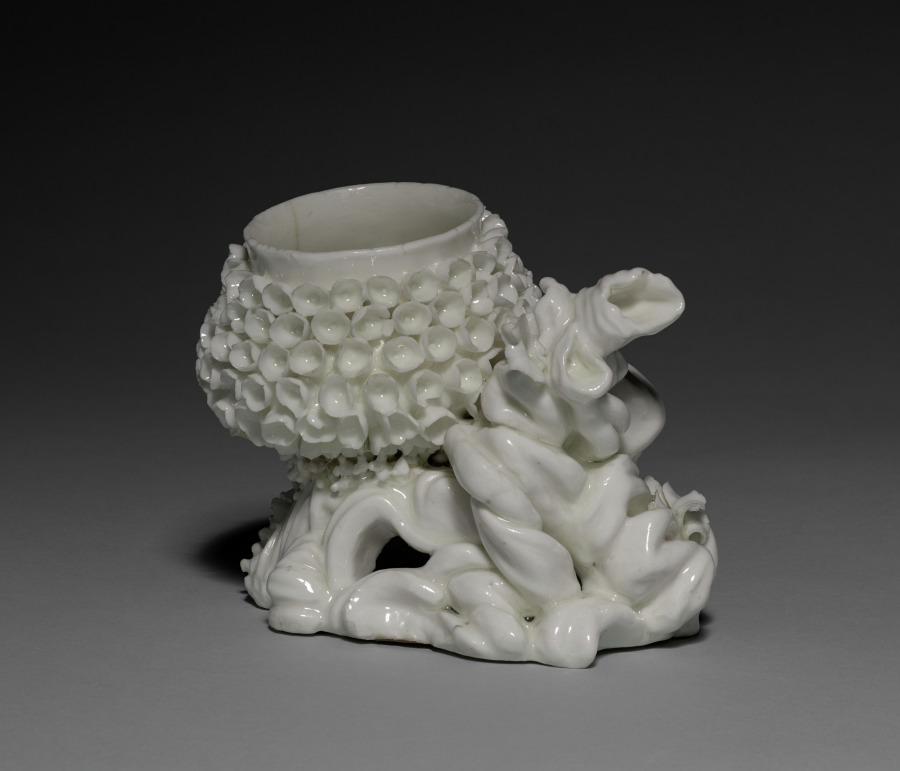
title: Potpourri Vase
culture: France, Vincennes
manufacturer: Vincennes Porcelain Factory (France, 1740–56)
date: c. 1750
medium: soft-paste porcelain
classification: Ceramic